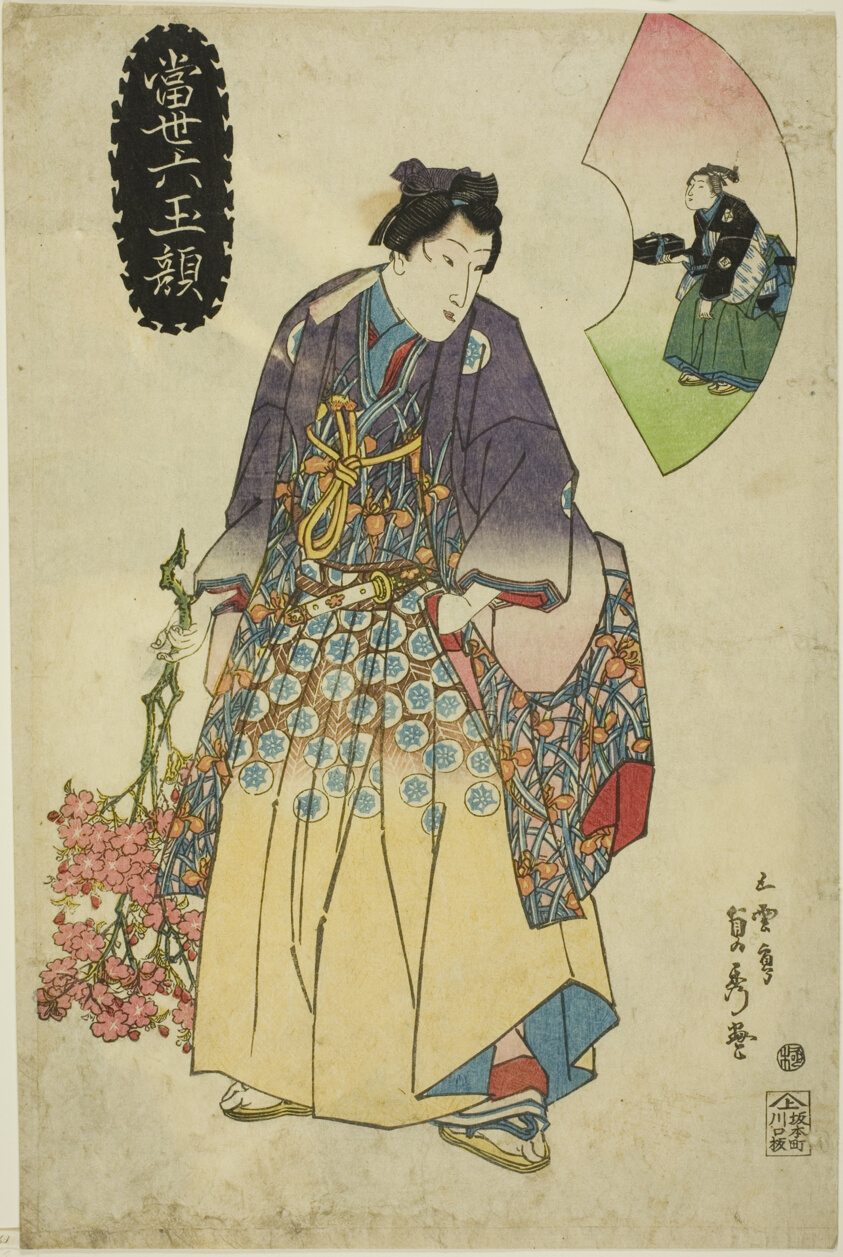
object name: Print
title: Contemporary Six Jewel Faces (Tosei Mutamagao)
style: Japanese (culture or style)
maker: Utagawa Sadahide (Japanese, 1807-1873)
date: c. 1830/43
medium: Color woodblock print; oban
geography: Japan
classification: print; asian art